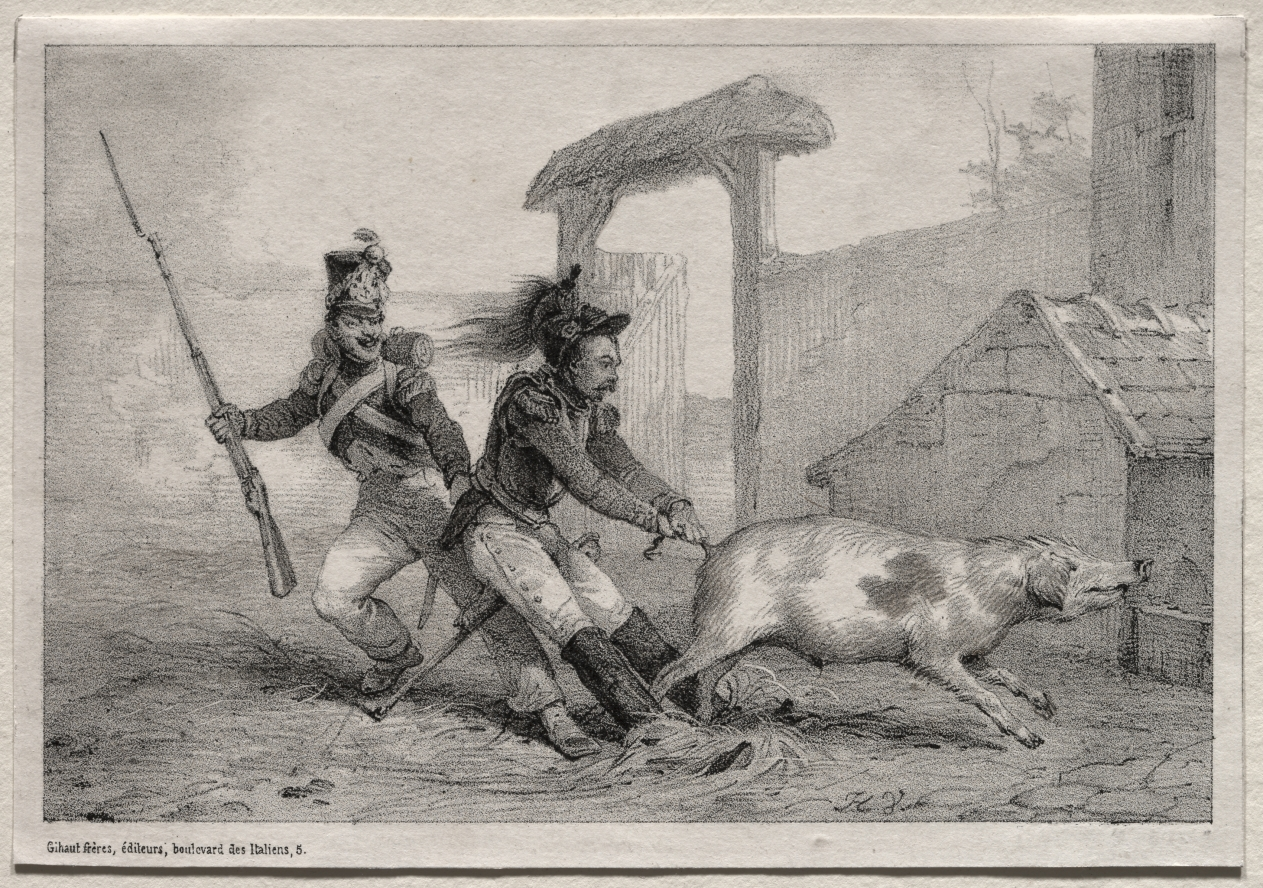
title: Hold Fast!, or the Marauders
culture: France, 19th century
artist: Horace Vernet (French, 1789–1863)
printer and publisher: Delpech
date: 1823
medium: lithograph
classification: Print